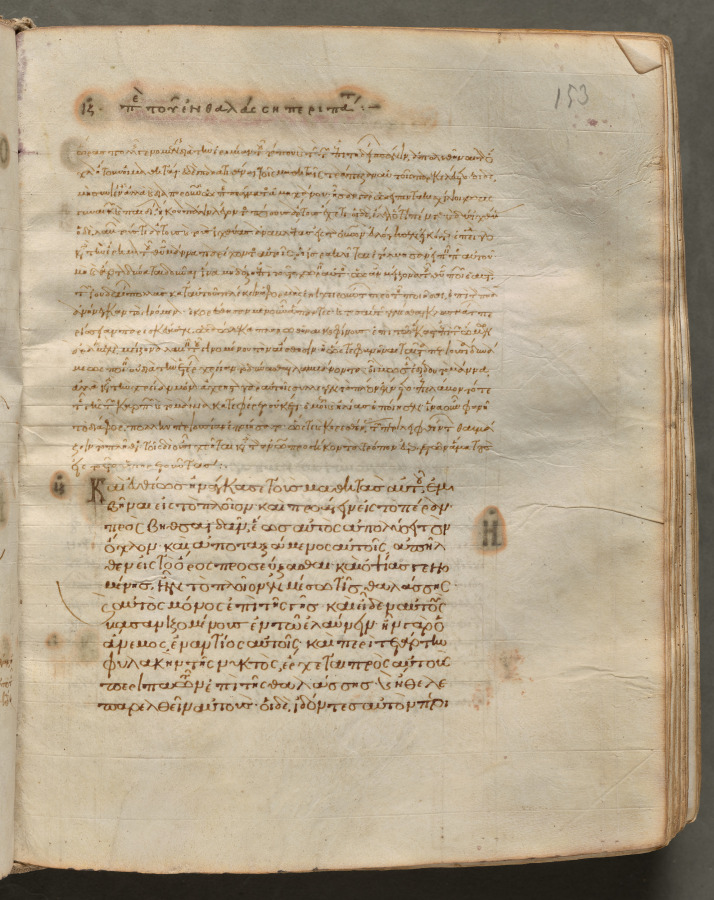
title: Text, folio 153 (recto), from a Gospel Book with Commentaries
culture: Byzantium, Constantinople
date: c. 1000–1100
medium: ink, tempera, and gold on vellum; leather binding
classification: Bound Volume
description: Each of the four gospels in this book opens on a page with brilliantly illuminated borders depicting the author of the text as well as birds-principally peacocks, symbols of the immortality of the soul-and fountains, representing the fountain of life and the salvation of the soul. This volume consists of 428 leaves with texts in Greek. Its level of sophistication suggests that it was probably written and decorated in a monastery in Constantinople.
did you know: Gospel Books were carried in procession through Byzantine churches.